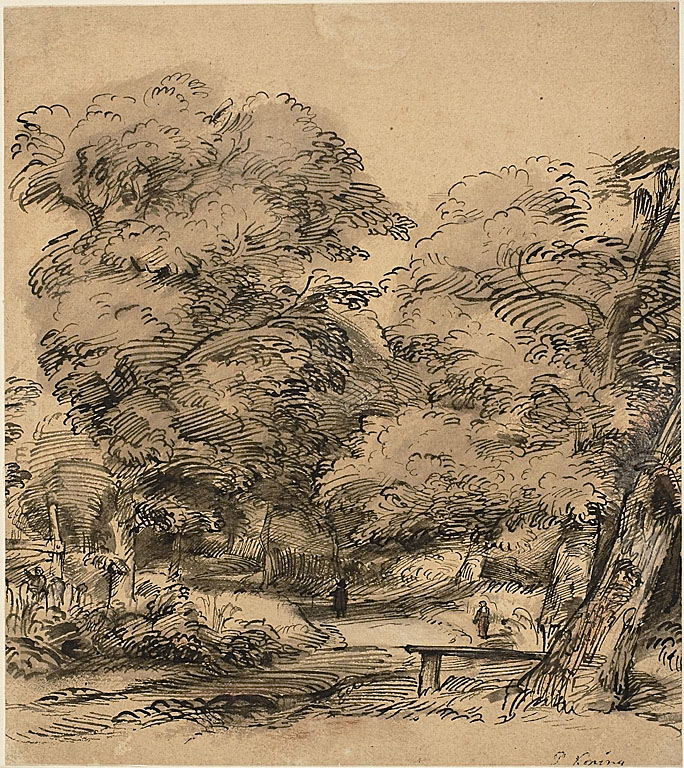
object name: Drawing and Watercolor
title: A Path in the Woods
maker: Philips de Koninck (Dutch, 1619-1688)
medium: Pen and brown ink with brush and brown wash, with touches of red chalk and white heightening, on tan laid paper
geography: Holland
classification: pen and ink drawings; drawings (visual works); prints and drawing